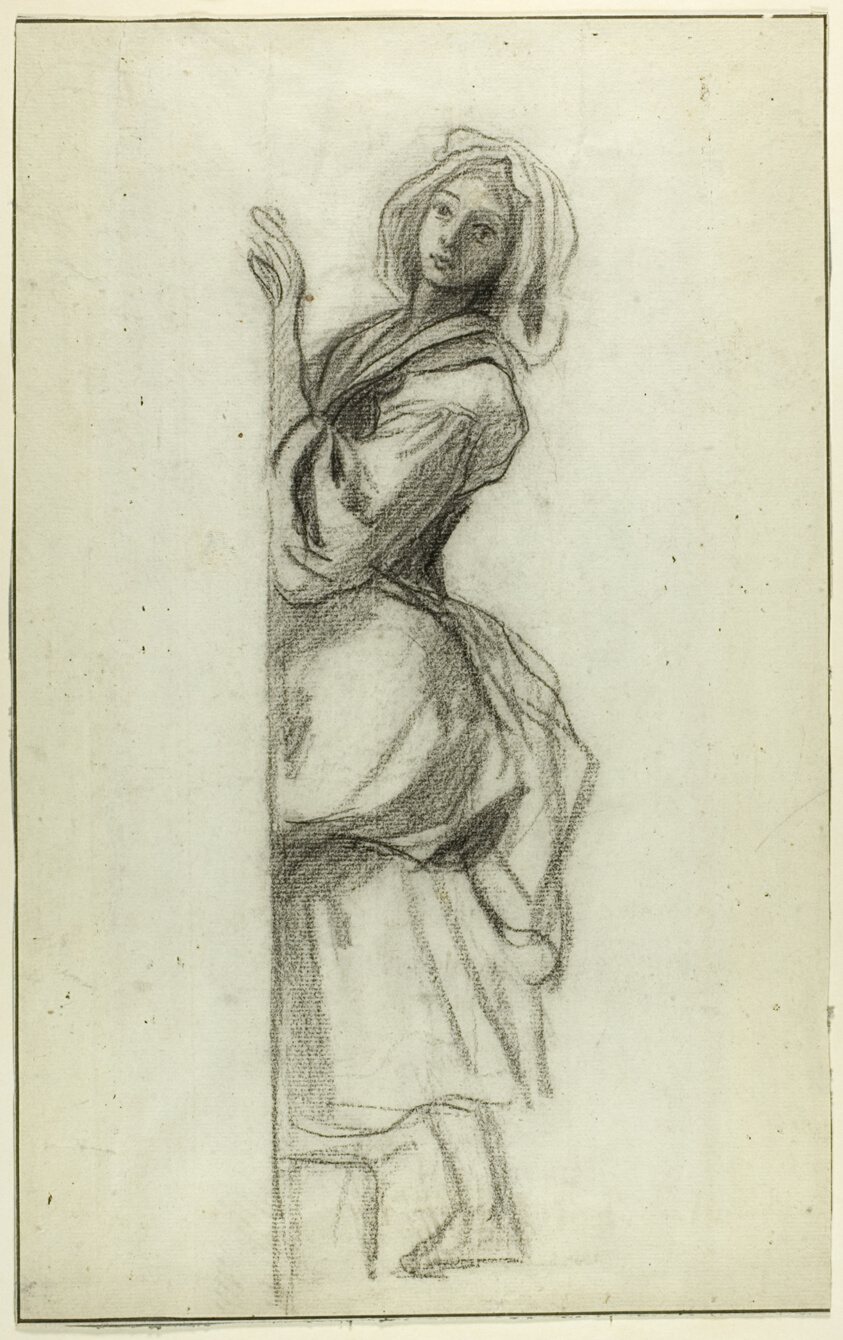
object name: Drawing and Watercolor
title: Study of a Peasant Girl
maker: Camille Roqueplan (French, 1803-1855)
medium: Charcoal on ivory laid paper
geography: France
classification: charcoal; drawings (visual works); prints and drawing